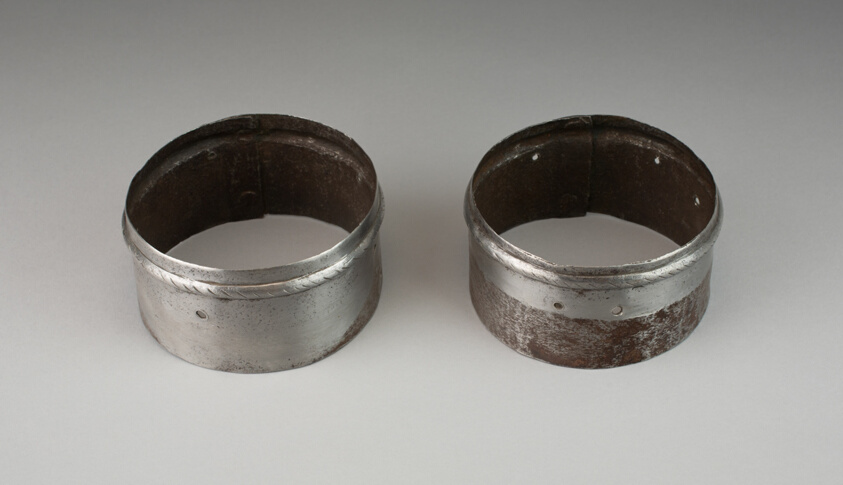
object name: Armor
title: Pair of Turning Rerebrace Plates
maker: German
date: c. 1540/60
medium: Steel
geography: Germany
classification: suit-element; armor; arms and armor